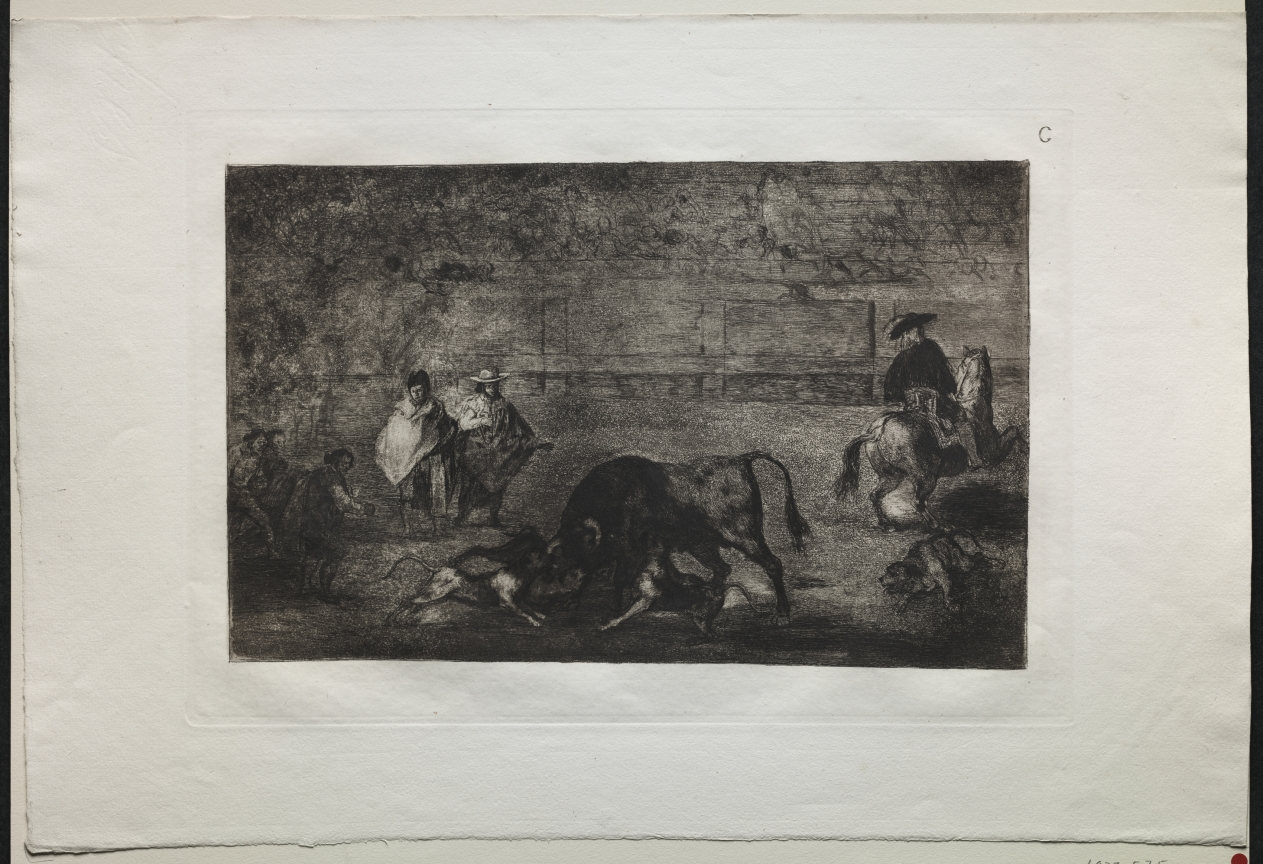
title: Bullfights: The Dog Let Loose on the Bull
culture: Spain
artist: Francisco de Goya (Spanish, 1746–1828)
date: 1816, printed 1876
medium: engraving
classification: Print